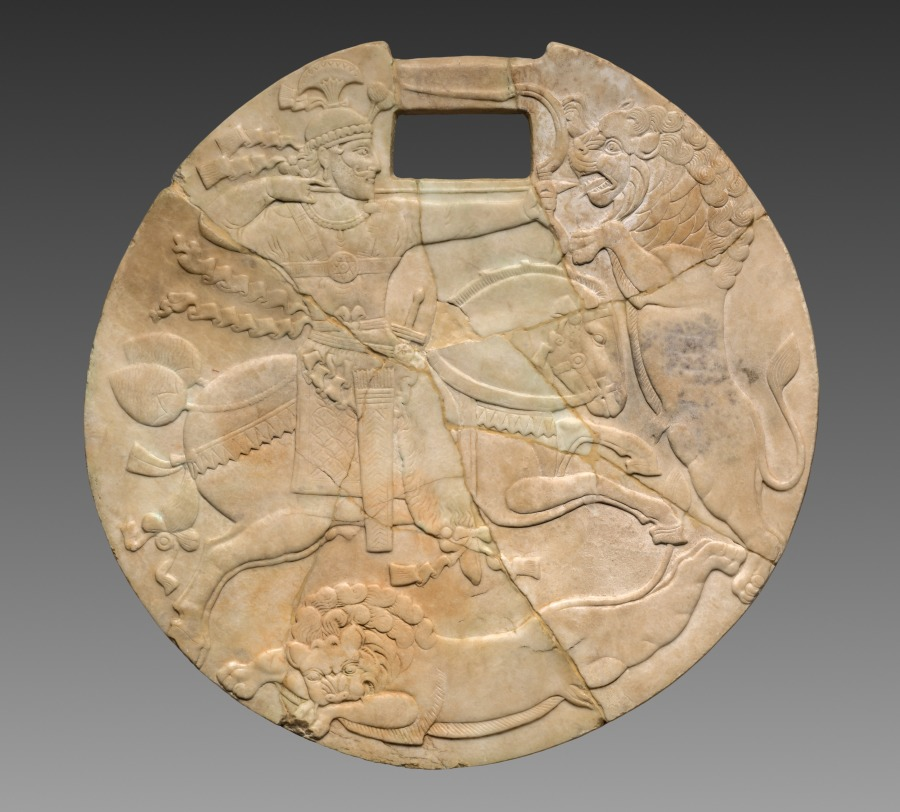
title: Sasanian King Hunting Lions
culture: Iran, Sasanian Empire (224–651 CE)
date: late 300s CE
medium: alabaster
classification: Sculpture